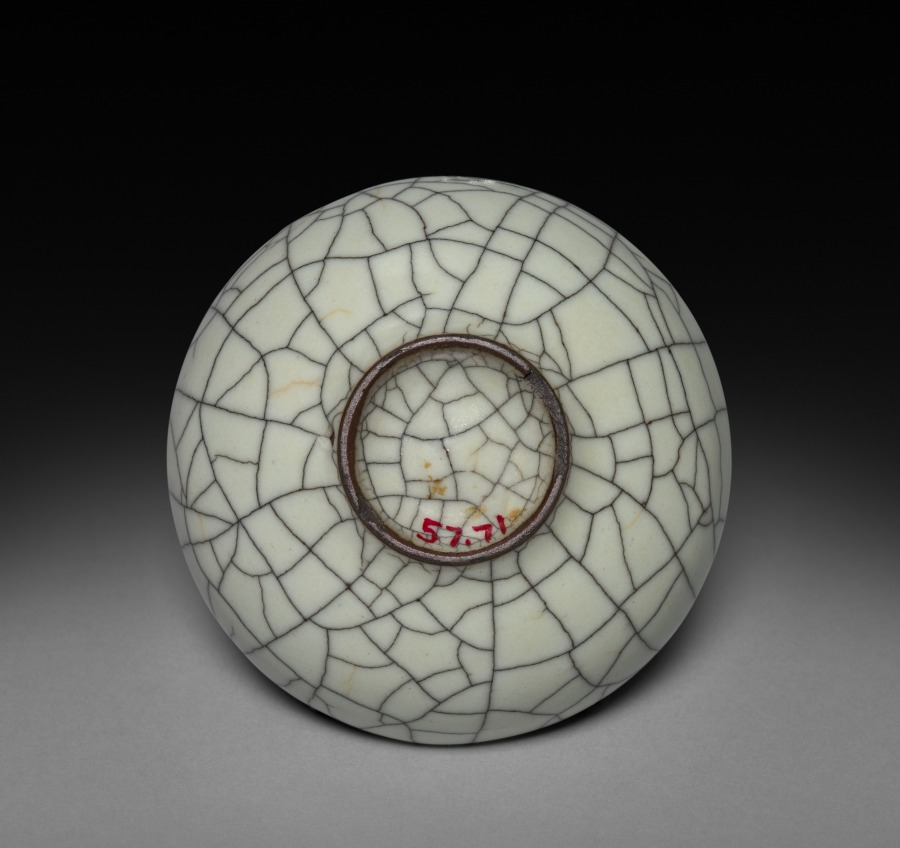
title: Wine Cup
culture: China, Song dynasty (960-1279)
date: 960–1279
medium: Glazed dark brown stoneware, Guan ware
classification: Ceramic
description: Wine was often served hot in porcelain cups that could also be used in popular drinking games.